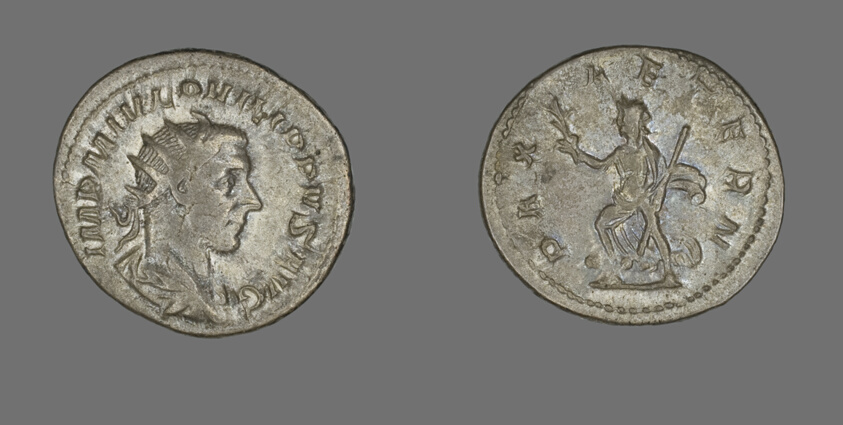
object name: Coin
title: Antoninianus (Coin) Portraying King Philip I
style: roman (ancient, style or period)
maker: Roman, minted in Rome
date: 244-247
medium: Silver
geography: Roman Empire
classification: coin; ancient art